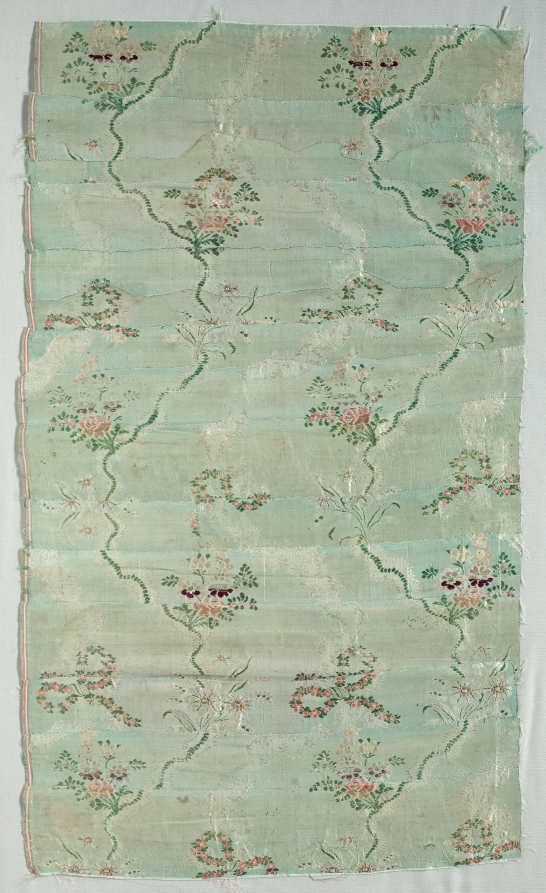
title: Panel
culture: France, mid-18th century, Period of Louis XV (1723-1774)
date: mid 1700s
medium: plain compound cloth, brocaded; silk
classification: Textile